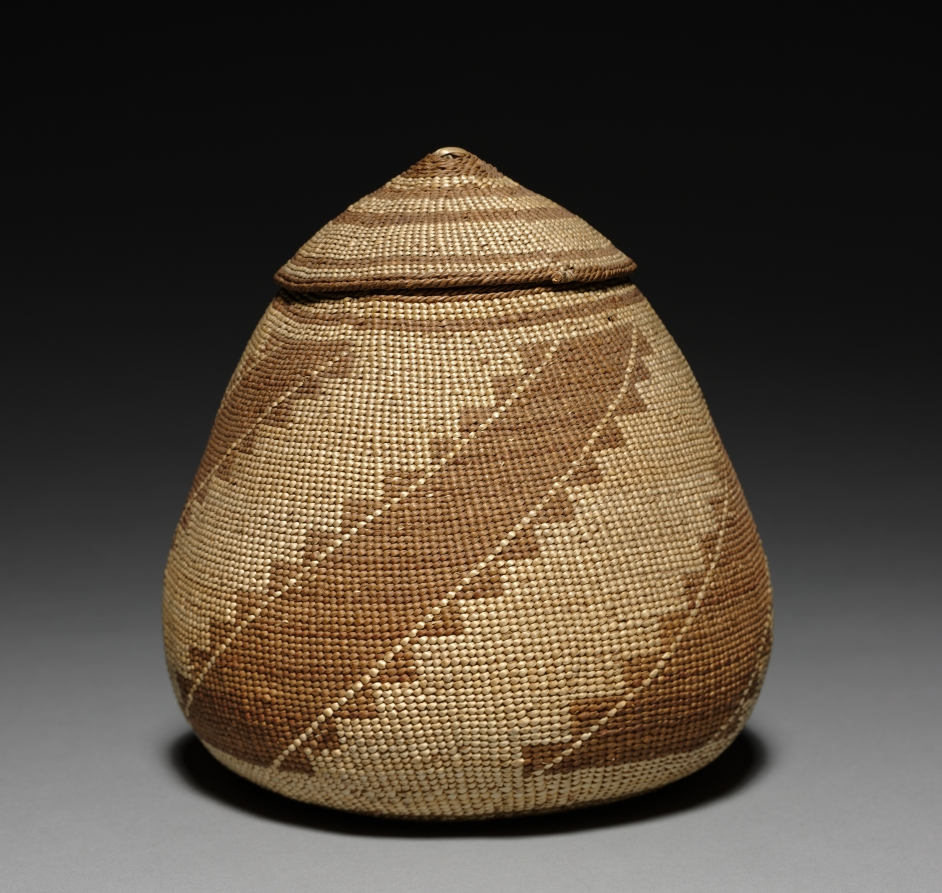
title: Tobacco Basket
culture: California, Yurok, late 19th century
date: c 1875– 1900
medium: twined grasses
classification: Basketry